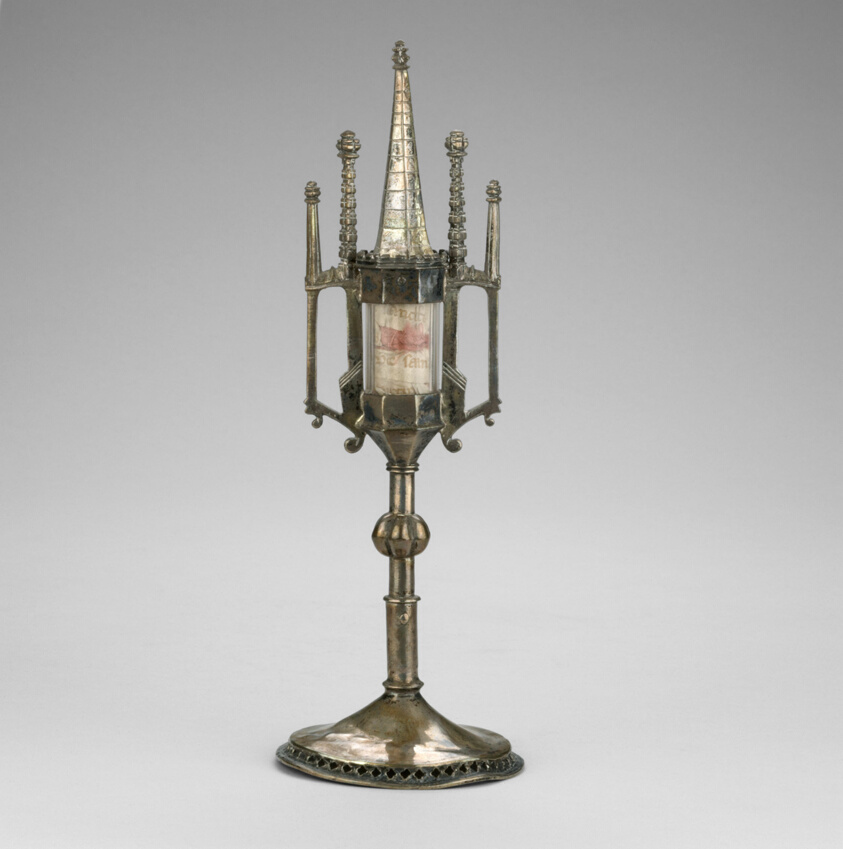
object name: Decorative Arts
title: Reliquary Monstrance with Relics of Saints Anianus and Lawrence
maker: German, probably Brunswick (Braunschweig)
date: 1375/1400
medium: Silver and rock crystal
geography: Brunswick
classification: silver; metalwork; european decorative arts; decorative arts